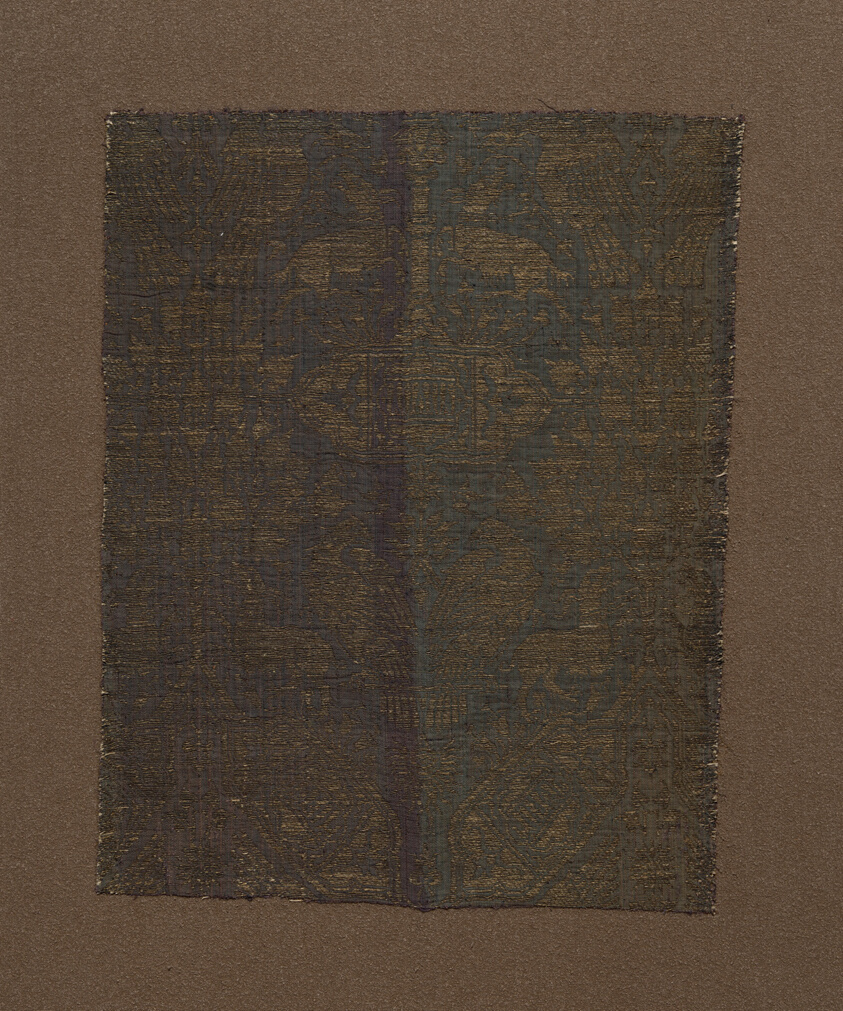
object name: Textile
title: Fragment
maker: Italy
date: 1425/75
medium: Silk and gilt-animal-substrate-wrapped linen, twill weave with twill interlacings of secondary binding warps and patterning wefts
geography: Italy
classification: textile; weaving